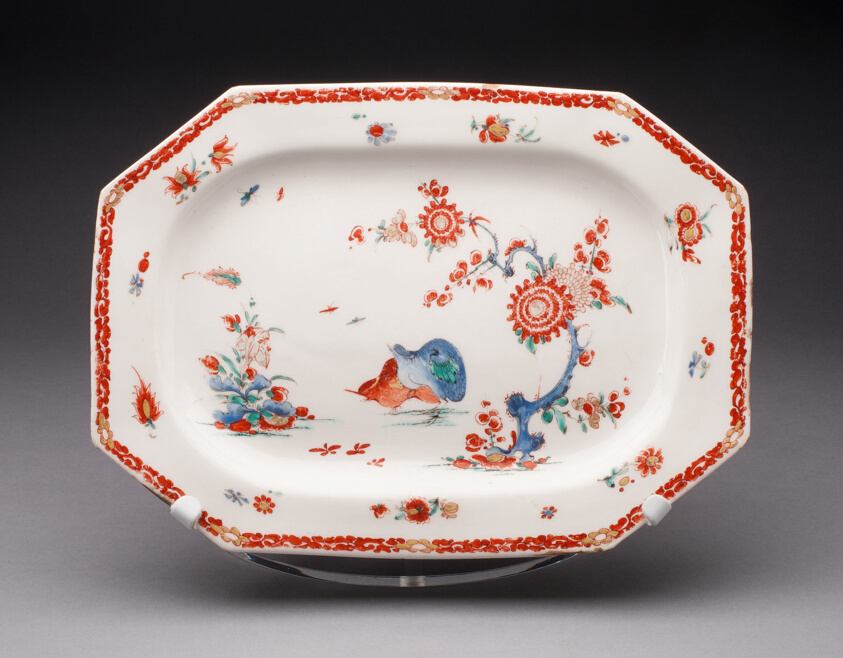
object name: Ceramics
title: Platter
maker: Bow Porcelain Factory (London, England, 1744-1775)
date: c. 1755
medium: Soft-paste porcelain, polychrome enamels and gilding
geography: Bow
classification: vessel for serving food; dish (vessel); porcelain; european decorative arts; ceramics